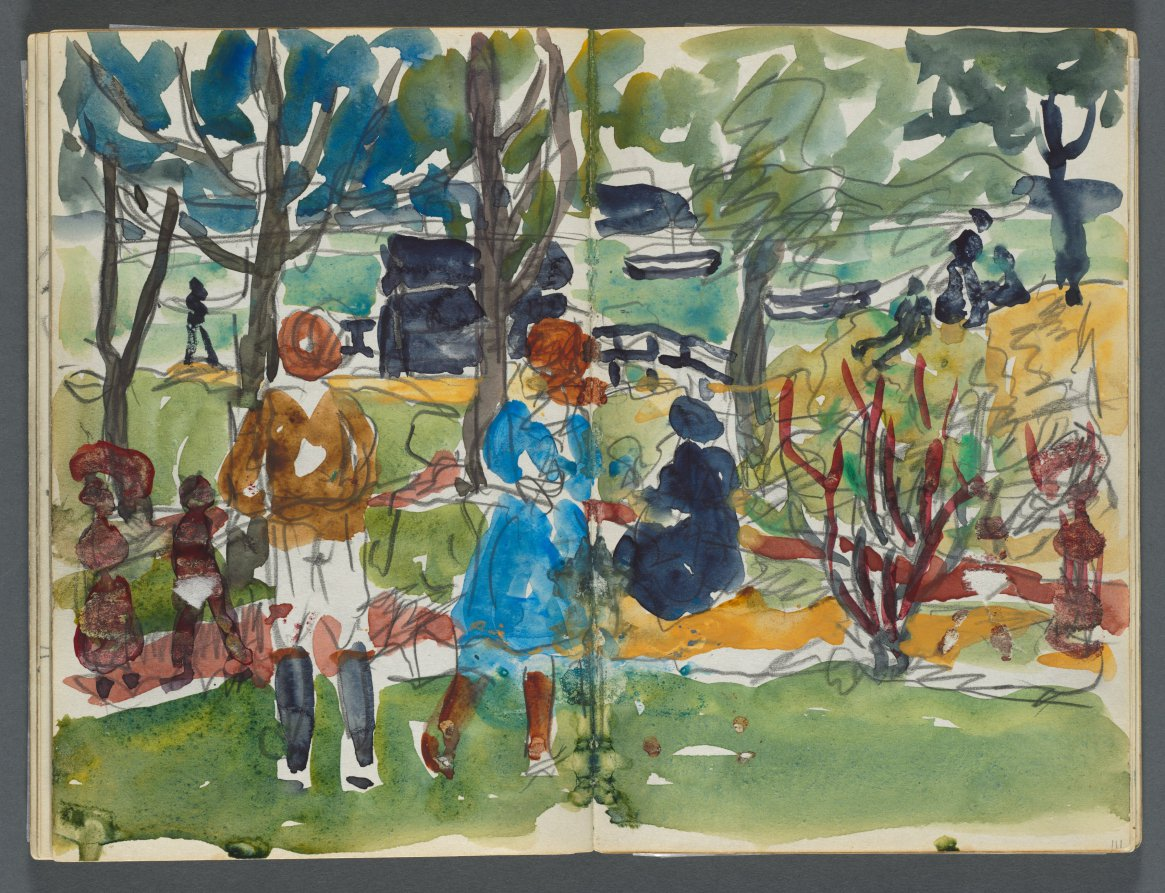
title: Sketchbook, The Dells, N° 127, page 110 & 111: Figures in a Landscape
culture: America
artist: Maurice Prendergast (American, born Newfoundland [now Canada], 1858–1924)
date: c. 1919–1921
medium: graphite and watercolor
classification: Bound Volume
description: This sketchbook contains 59 pages of graphite drawings and 16 watercolors made at various locations on Cape Ann, Massachusetts.